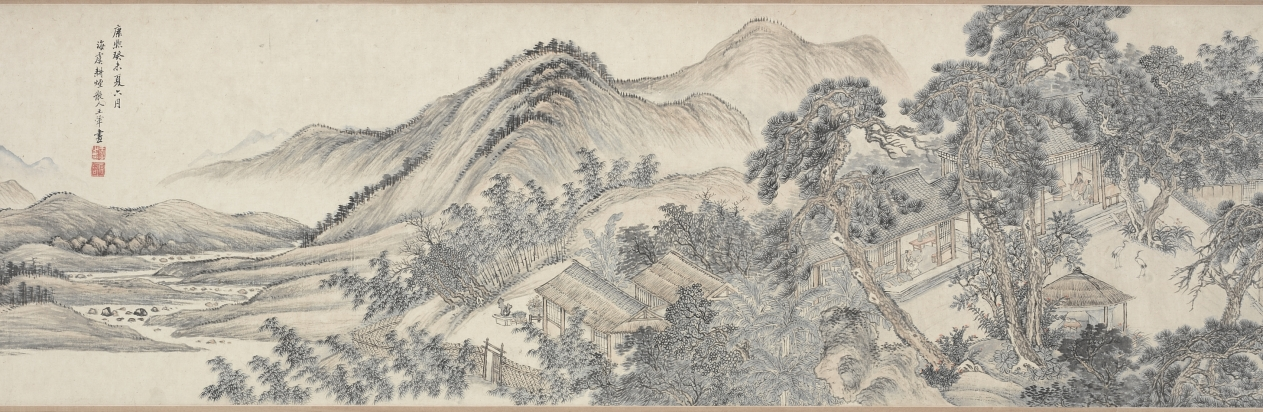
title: Hall of Lofty Pines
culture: China, Qing dynasty (1644-1911)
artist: Wang Hui (Chinese, 1632–1717)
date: 1703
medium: handscroll; ink and color on paper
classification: Painting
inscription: [題] 松喬堂圖 康熙癸未夏六月, 海虞耕煙散人王翬畫。[印]王翬之印; 石谷. [左下] 來青閣; 耕煙野老時年七十有二.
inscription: 松喬堂圖一卷，海虞石谷王君為靜海近公厲少司冦公作也。圖成于癸未之夏。未幾而公遂仙去。公令子今編修君南湖屬余題跋其後。余與公同官侍從，交契最深。側見公之清修純德，蔚為聖天子所眷重。侍直內廷，密勿贊襄，幾二十餘年。蒼生之所以受賜，士林之所以沐德者，天下莫能窺，在廷莫能悉。而公卒不言。以故宸衷日益契，恩禮亦日益渥。雖年逾懸車，時有歸老之念。而上固不聼公之去。其所謂松喬堂者，御書以賜公者也。蓋以松比公之清風勁節，而歲寒不改，經霜彌茂。則又以期公之壽考未有艾焉。公知此身未易乞，而山林槃磵之樂，止可寄諸寤思。此松喬堂圖之所由作也歟。石谷此圖，結構精密，筆墨超邁。其寫樹木之蒼蔚，堂宇之靚幽。恍見摩詰輞川樂天廬山之勝。獨惜公未得一日徜徉故園以償其願。即繪於圖亦未得以永其趣，此編修君之所以眷眷不忘也。雖然千歳之松喬，下蔭百畝，上以修棟梁之需。然則上當日名堂之意，不更望於後之人襲其芘而養其材也哉。吾願編修君之寶斯圖。并望君之塗塈丹雘，大其堂構也已矣。 康熈丙戍重陽三日，雲間王鴻緒跋。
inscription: 10 additional seals: 1 seal of Li Duna 勵杜納 (1628–1703); 4 seals of Zha Ying 查瑩 (jinshi of 1766); 5 seals of Li Yun (dates unknown).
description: Wang Hui 王翬, a leading painter in the orthodox school of the early Qing dynasty (1644–1911), was commissioned to paint this landscape with a country estate for Li Duna 勵杜納 (1628–1703), vice minister of justice in Emperor Kangxi’s court. The emperor had honored Li by granting him a piece of calligraphy with the name of Li’s retirement retreat, “Hall of Lofty Pines.” He drew a comparison between pines and Li’s upright character, resilience, and longevity. Wang Hui’s painting was supposed to allow Li to imagine living in a beautiful, secluded compound among the hills and pines. Sadly, Li died before seeing the completed painting and before receiving the emperor’s permission to retire. The landscape begins with peaceful riverbanks and low hills. The pines around the estate in the middle of the handscroll are truly lofty, some stretching even beyond the frame of the painting. Li Duna, the estate’s owner, is shown twice in his serene mountain retreat: first approaching the entrance to the compound with two servants at the right, and then later in the scroll, to the left, reading in the comfort of an inner room.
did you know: One servant carries the estate owner's carefully wrapped qin, a type of zither.